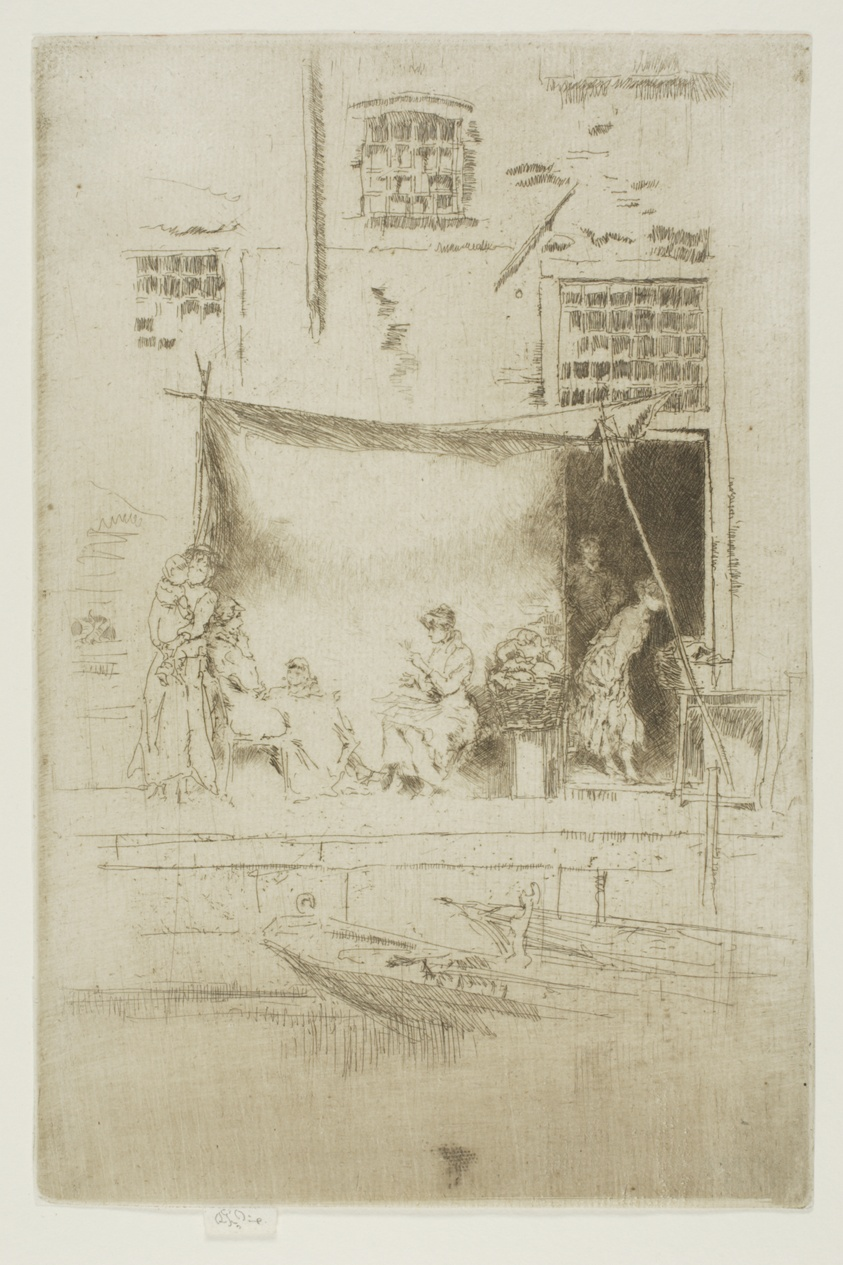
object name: Print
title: Fruit Stall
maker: James McNeill Whistler (American, 1834-1903)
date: 1879/80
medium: Etching and drypoint with foul biting in brown ink on ivory laid paper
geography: United States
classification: etching; drypoint; foul biting; print; prints and drawing; paper